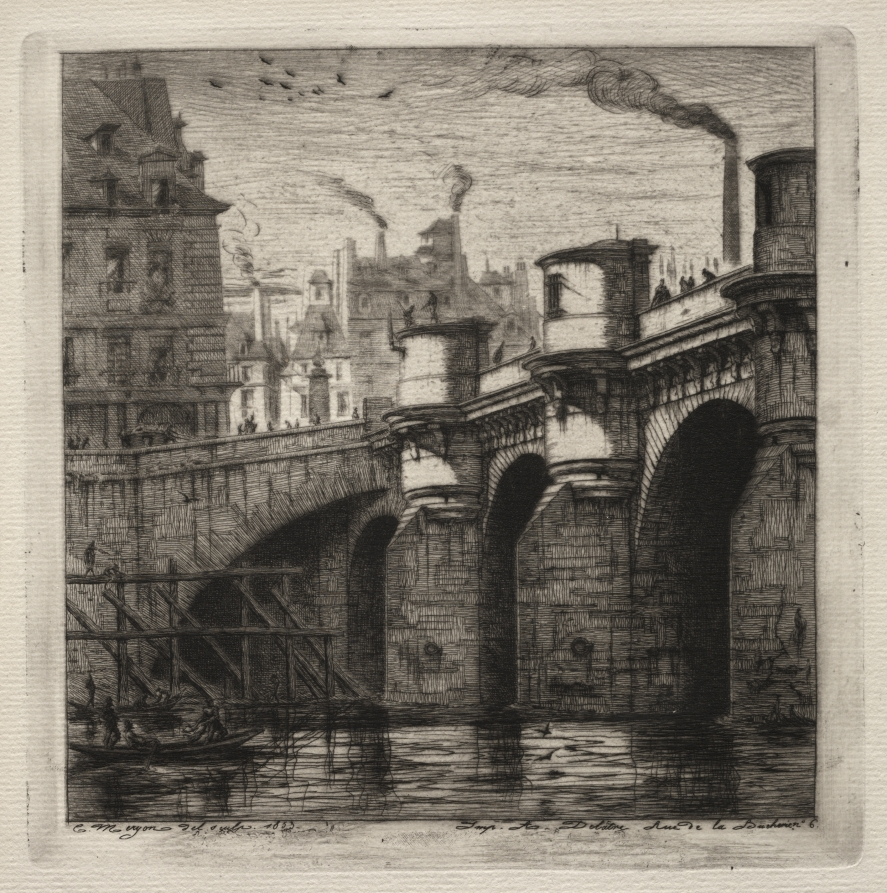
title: Etchings of Paris: The New Bridge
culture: France, 19th century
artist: Charles Meryon (French, 1821–1868)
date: 1853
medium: etching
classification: Print